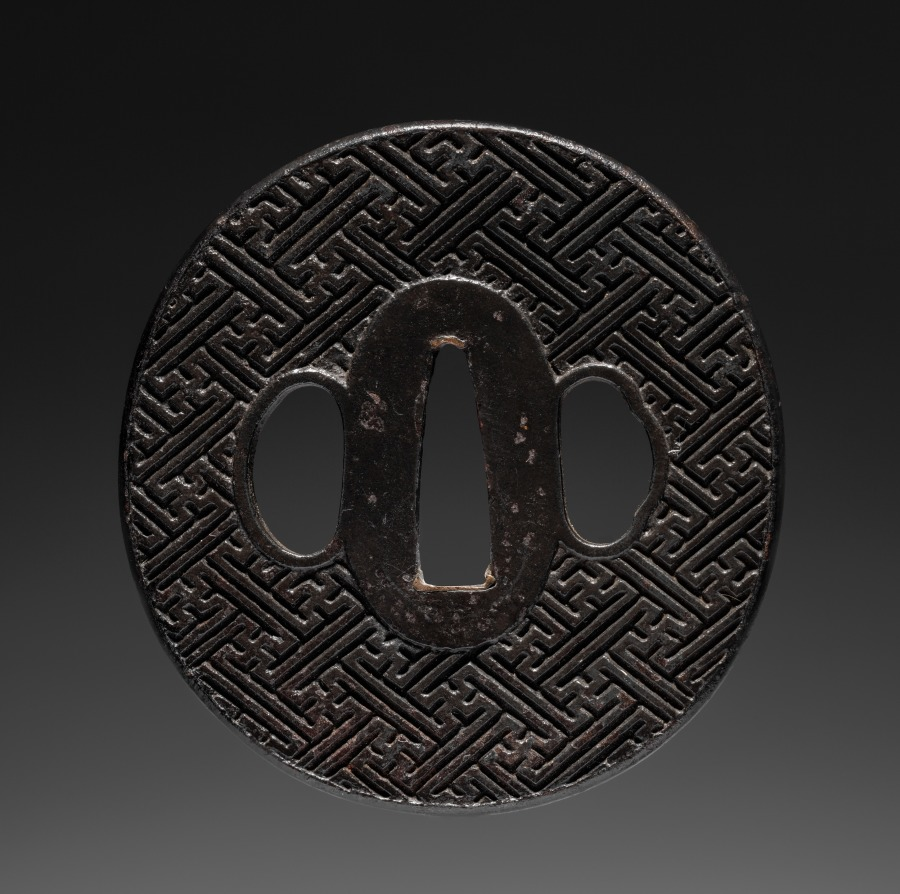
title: Sword Guard (Tsuba)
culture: Japan, possibly Edo period (1615-1868)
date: c. 1615–1868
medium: iron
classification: Arms and Armor